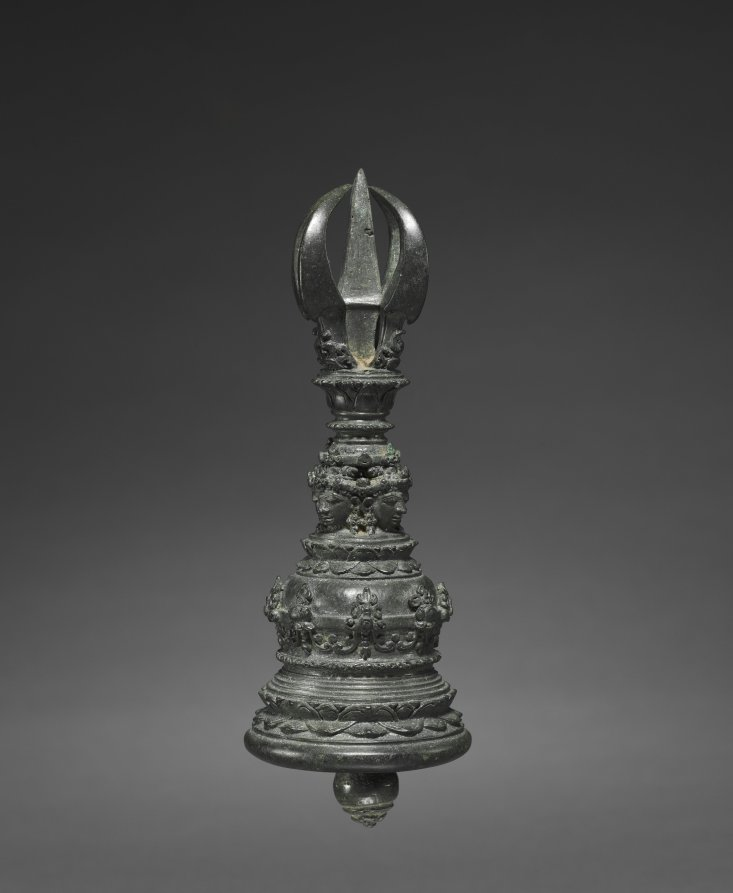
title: Bell with Vajra Handle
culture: Indonesia, Java, 10th century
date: 900s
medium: bronze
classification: Sculpture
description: The vajra and bell as a pair are an important combination of tantric implements. When used together, the vajra is held in the right hand and stands for tantric method; the bell refers to wisdom and is held in the left hand. When a tantric master holds the vajra and bell, he takes on the guise of an enlightened being who teaches and models tantric methods with wisdom and understanding.